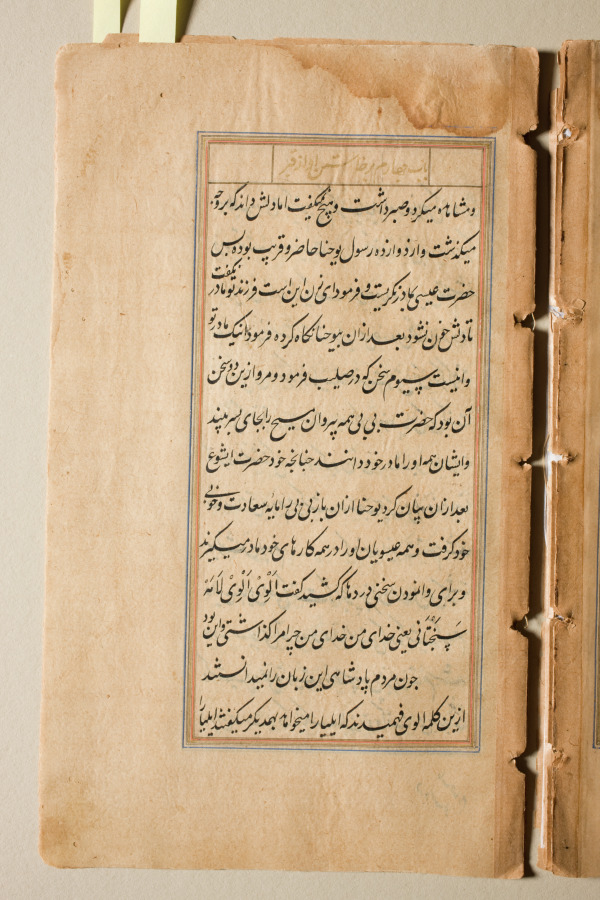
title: Text page from a Mirror of Holiness (Mir’at al-quds) of Father Jerome Xavier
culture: Mughal India, Allahabad, made for Prince Salim (1569–1627)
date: 1602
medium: Ink and gold on paper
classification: Manuscript